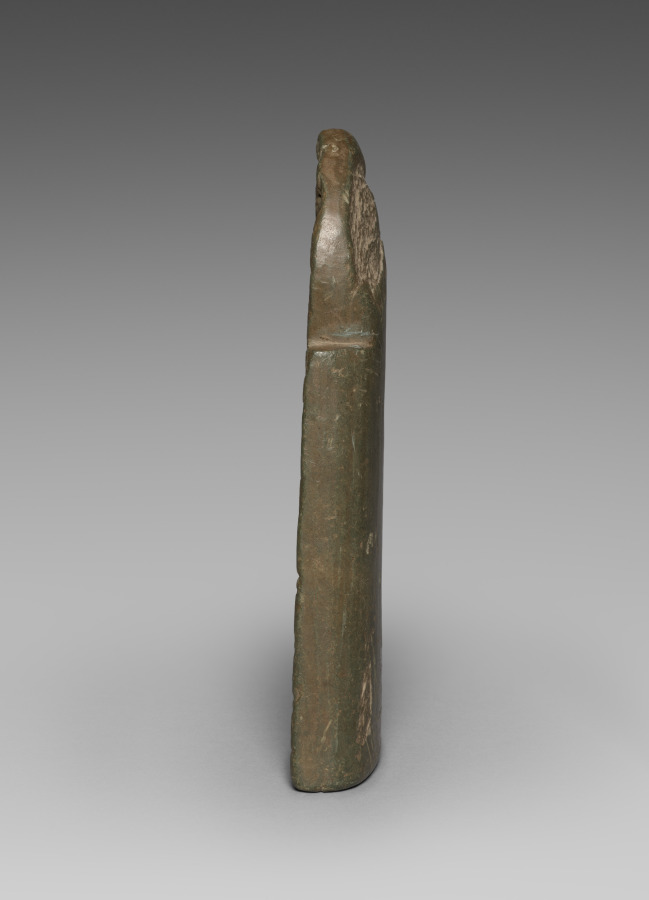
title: Section from a Portable Shrine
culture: Pakistan, Gandhara, Kushan period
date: 100s CE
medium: gray schist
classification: Sculpture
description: Figures of deities who protect children are featured in this relief carving. A form of Skanda holding a bird and a flower stands next to a regal yakshi with pointed rodent or elephant ears. A diminutive figure who may be a child is shown kneeling at his feet. Above, the six-headed mother goddess Shashthi sits next to Skanda, holding the spear.